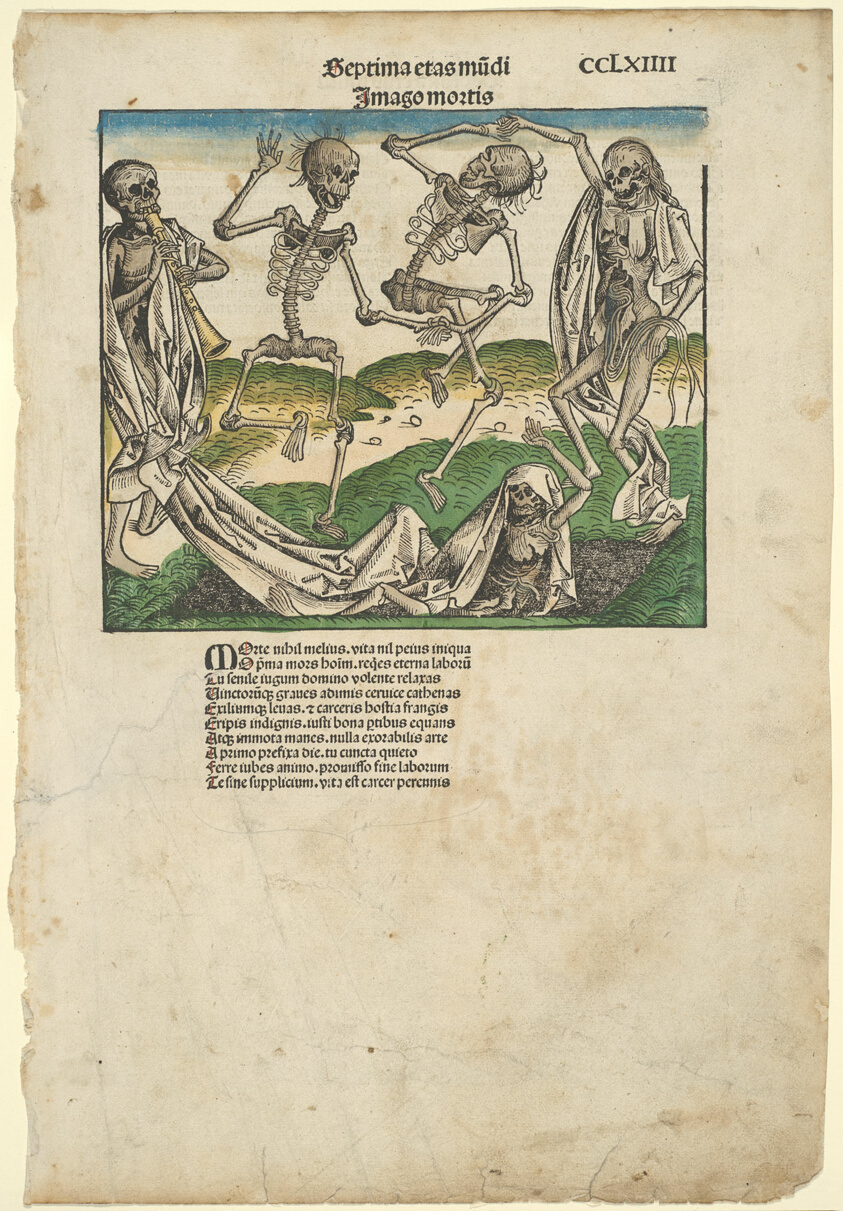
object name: Print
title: Image of Death (Imago Mortis), from the Nuremberg Chronicle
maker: Michael Wolgemut and Workshop; German, 1434-1519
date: c. 1493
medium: Handcolored woodcut in black on cream laid paper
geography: Germany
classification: woodcut; print; prints and drawing